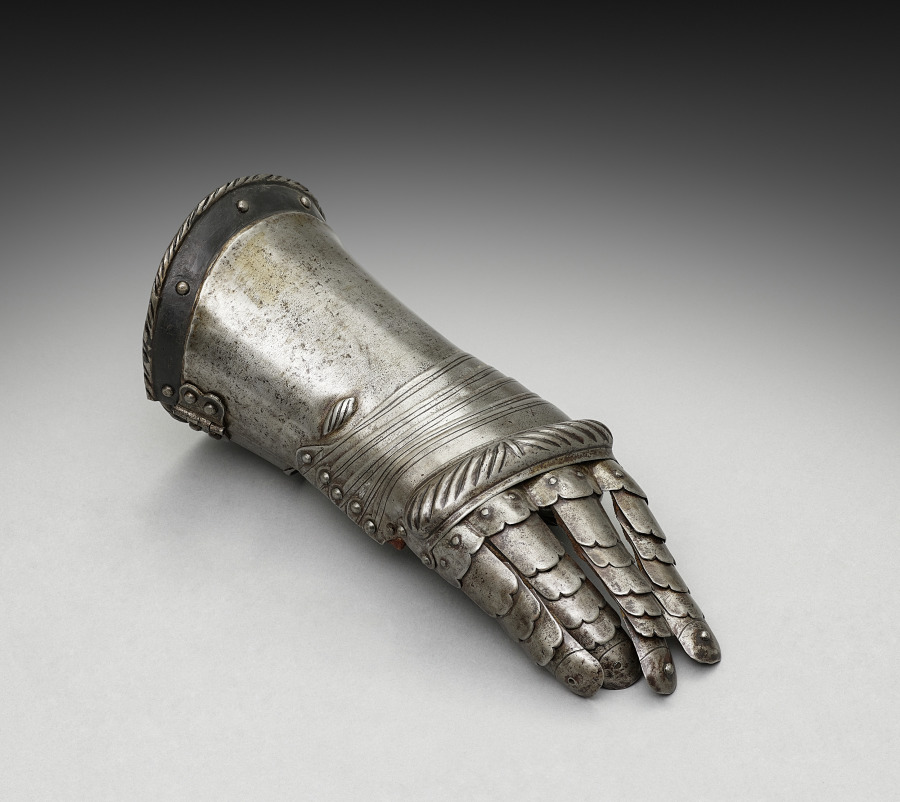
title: Right Gauntlet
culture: Germany, 19th century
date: 1801–1900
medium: steel with black paint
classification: Arms and Armor